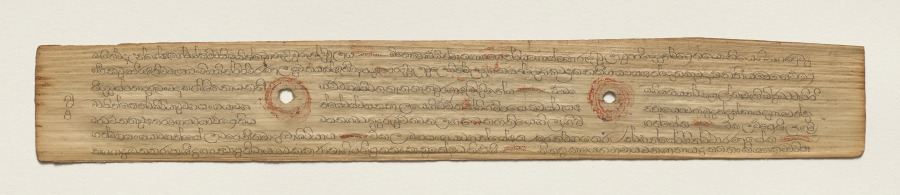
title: Leaf from a Buddhist Manuscript (recto)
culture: Sri Lanka, Singhalese, Late 17th century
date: c. 1700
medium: fiber paper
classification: Manuscript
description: Palm leaf material is still used for manuscripts in Sri Lanka. The palm leaves are prepared first by boiling them, drying them in the sun, and then rubbing them with oils. Scribes then use a metal stylus to incise the text. Then charcoal powder is wiped across the pages, filling in only the inscribed lines.